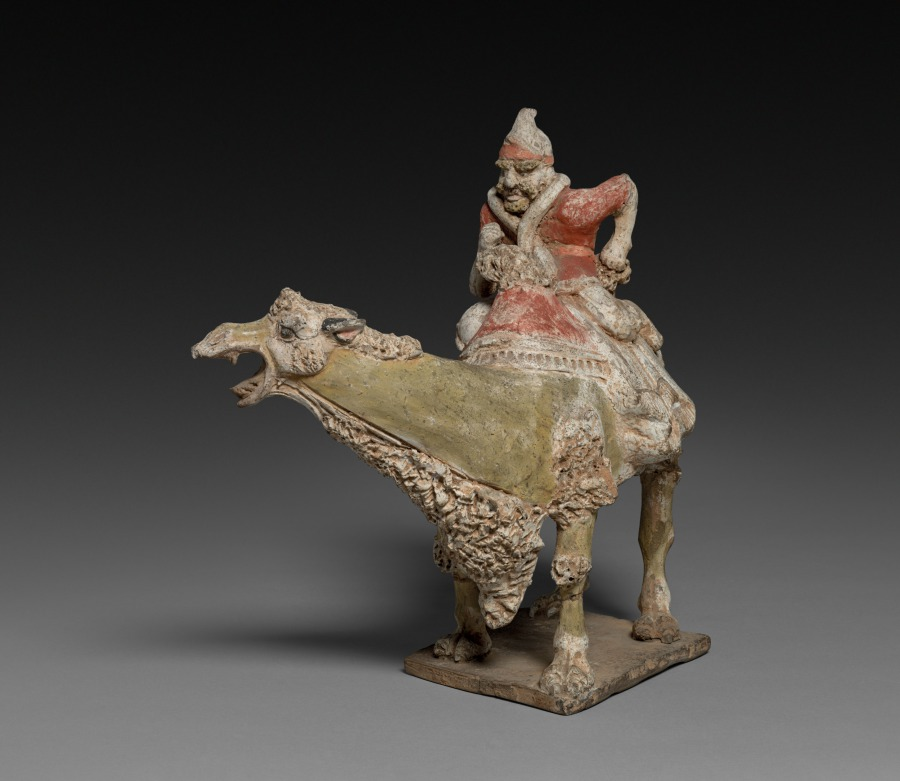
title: Camel with Rider (Tomb Figure)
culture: China, Sui dynasty (581-618) - Tang dynasty (618-907)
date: 20th Century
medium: brown earthenware with polychromy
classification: Sculpture